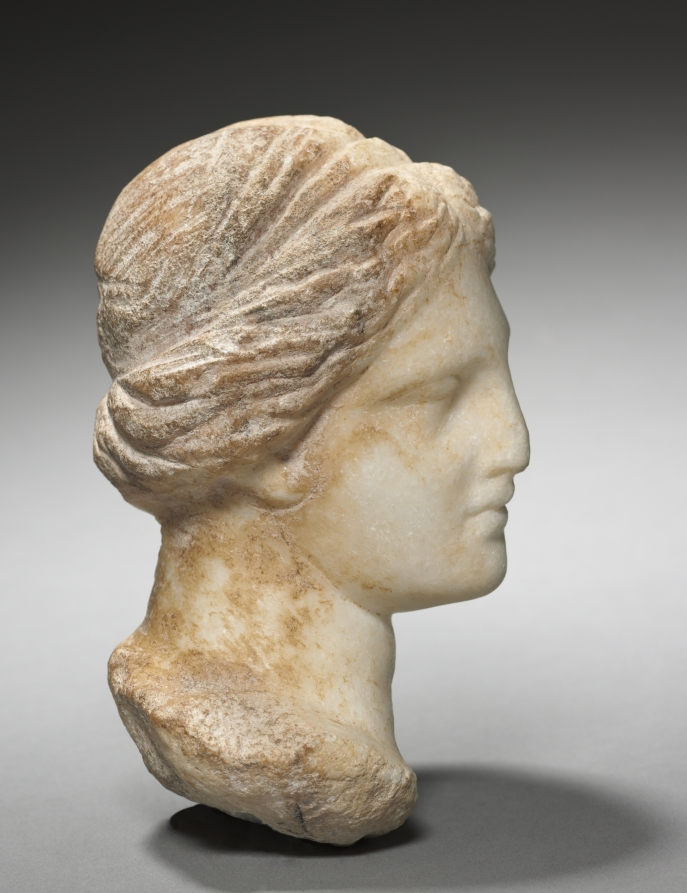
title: Head of a Woman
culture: Greece, Hellenistic period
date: 300–200 BCE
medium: marble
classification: Sculpture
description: The symmetry and proportions of this unidentified woman's portrait harkens back to the classical style made popular in the 4th century BC by the master Greek sculptors Praxiteles and Lysippos. Her center-parted wavy hair, rolled into an up-do, reflects the style of the later Hellenistic period when this work was made.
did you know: This hairstyle was achieved by rolling the hair and tucking it into the band behind the ears.